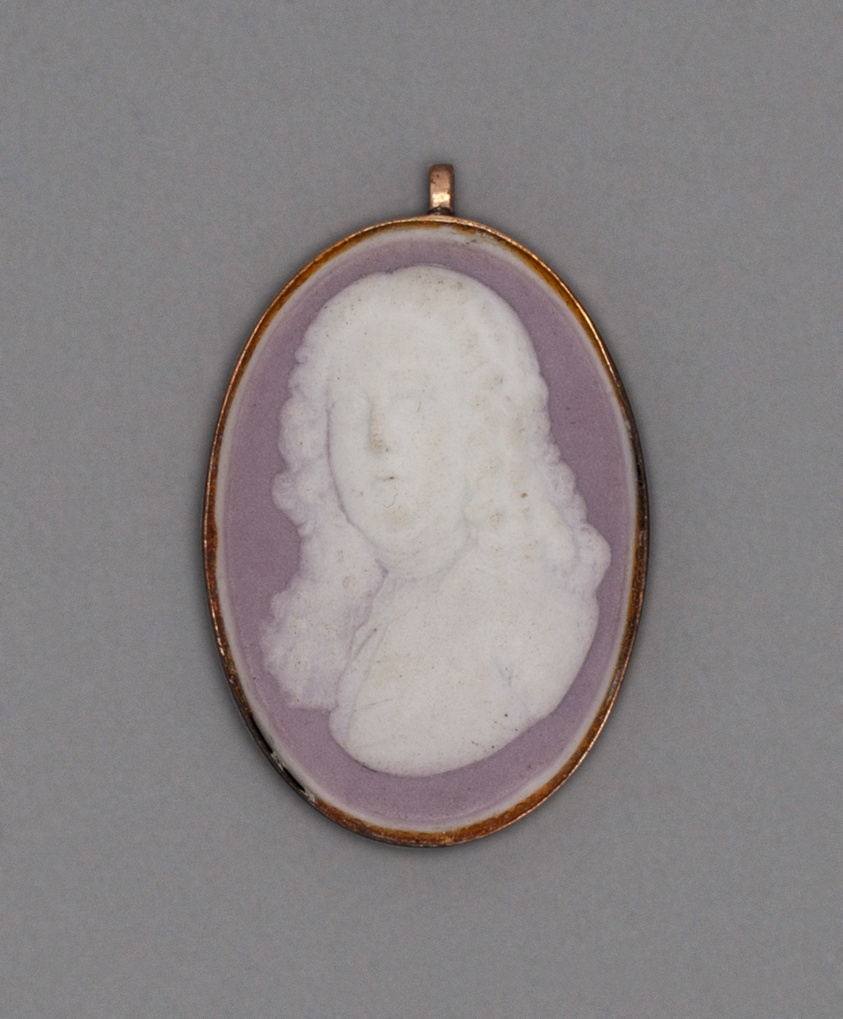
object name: Ceramics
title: Cameo Locket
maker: Wedgwood Manufactory (England, founded 1759)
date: Late 18th century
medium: Stoneware (jasperware)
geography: Burslem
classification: locket; accessories (object genre); jewelry; cameo (sculpture); stoneware; european decorative arts; ceramics